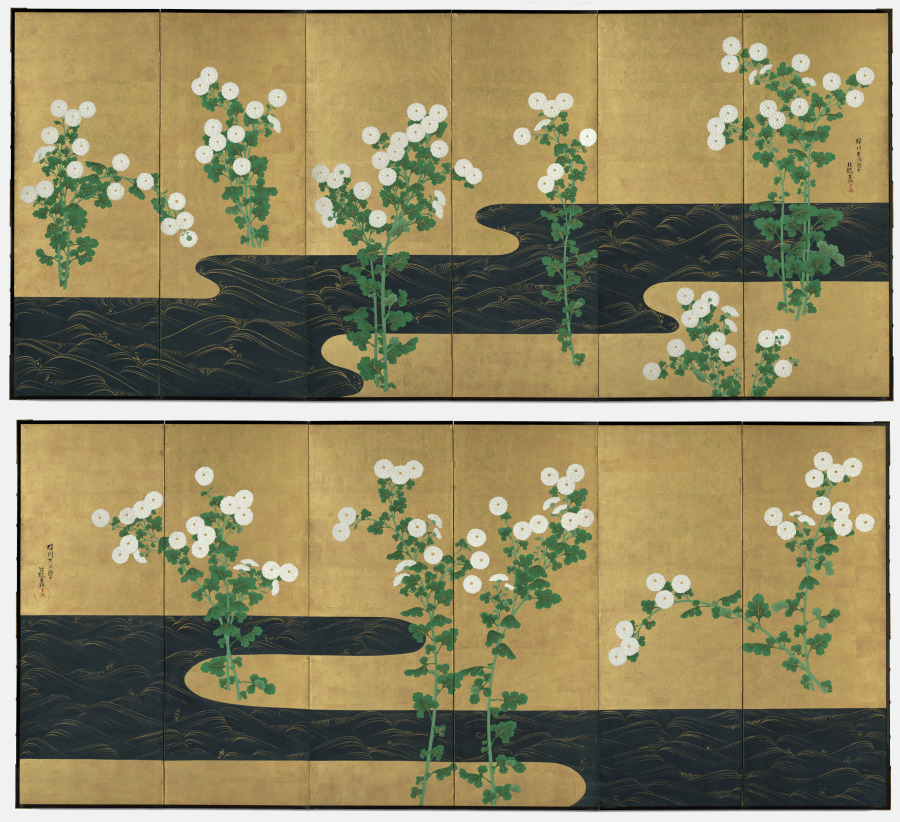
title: Chrysanthemums by a Stream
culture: Japan, Edo period (1615–1868)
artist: possibly by Ogata Kōrin (Japanese, 1658–1716)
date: c. 1715–30 or later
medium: Pair of six-panel folding screens; ink and color on gilded paper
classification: Painting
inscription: 蝉川末派隠士 法橋光琳 方祝（朱丸印）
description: These screens recall a painting style so closely identified with Ogata Kōrin (1658–1716) that it is called Rinpa, or “Rin School,” after the ideograph “rin” in his name. The highly stylized background accentuates floral groupings that have been groomed so as to appear utterly artificial, like the synthetic arrangements available today. Kōrin's genius derived in large measure from natural phenomena painstakingly observed and then manipulated to create compositions of startling refinement and sparkling isolation. This process may have grown out of Kōrin's early immersion in the family textile business, a medium that encourages such dramatic distillations of form: the stream's gold-crested waves bring to mind traditional kimono robe designs of Kōrin's era. Works with the signature seen on this painting, including a style name, or persona suggested to Kōrin by his brother Kenzan (1663–1743), are sometimes considered to have been produced either in the last year of his life, when he was very ill, or after his death. In both scenarios, the lion’s share of the work would have been done by studio assistants, but little is truly known of his studio practice. Given the regularity of the gold waves on the stream, and the tension in the arrangement of the chrysanthemums, it is also possible that the screens were made in emulation of Kōrin's designs by a later artist.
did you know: The signature used on these screens can perhaps indicate paintings made in the last year of the artist's life, or works completed by his studio after his death.